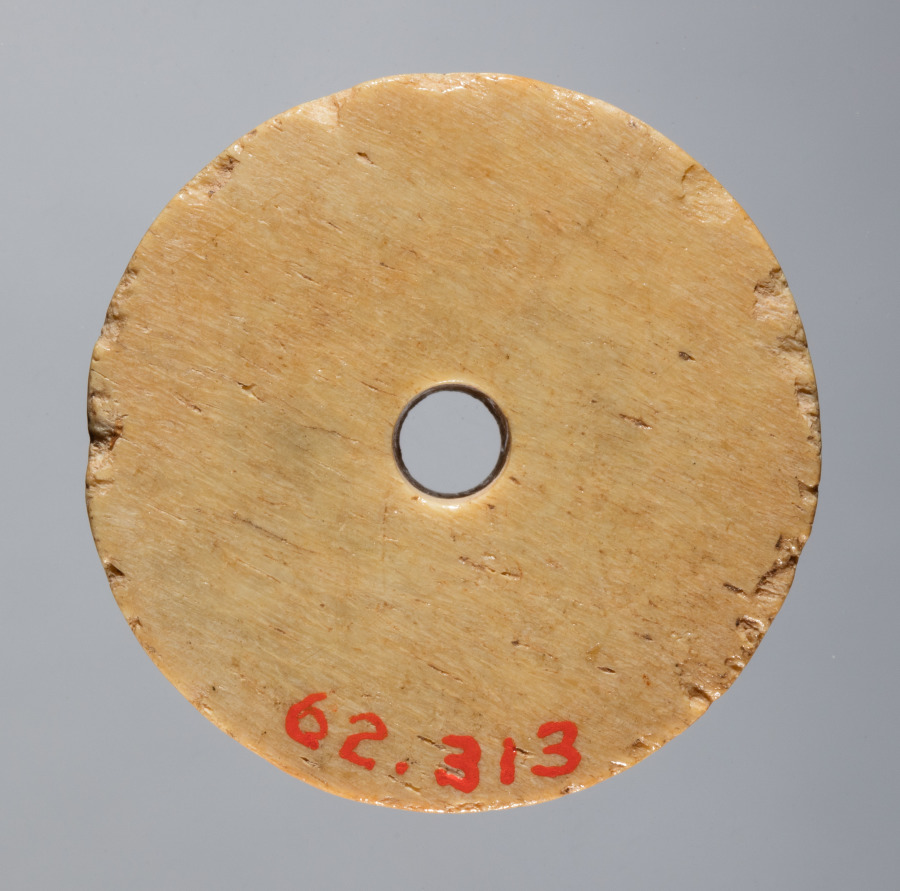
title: Spindle Whorl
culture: Iran, early Islamic period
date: 700s - 900s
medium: bone, incised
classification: Spindle Whorl